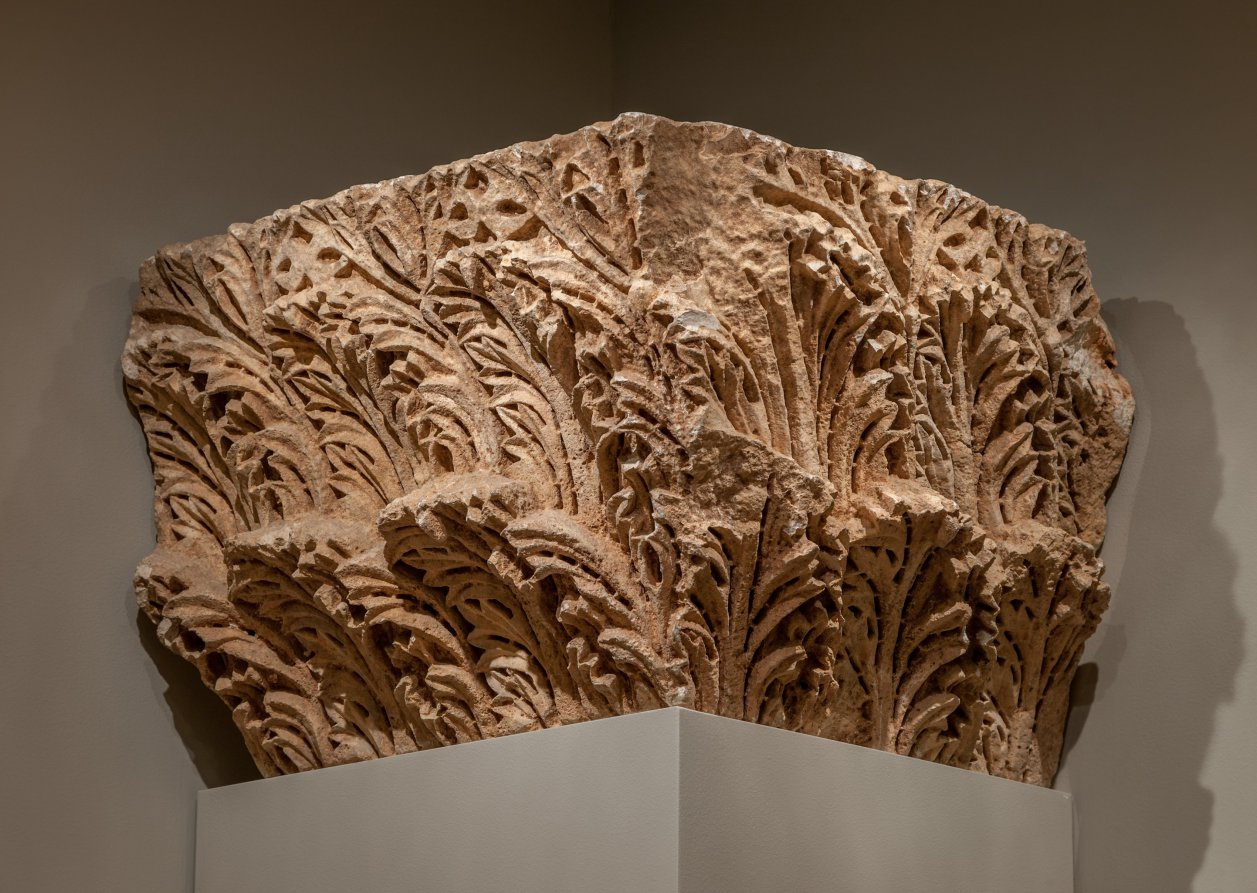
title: Engaged Capital with Windblown Acanthus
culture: Byzantium, Northern Syria, Byzantine period, 5th century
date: 400s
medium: limestone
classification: Sculpture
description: These capitals - the Capital with Acanthus and Crosses and the Engaged Capital with Windblown Acanthus - may have been found in Northern Syria and presumably come from a large and important church. Both capitals are decorated with leaves of acanthus, a fleshy plant with jagged leaves native to the Mediterranean area. One capital is symmetrical with crosses in its ornament, the other is asymmetrical and gives the impression of windblown leaves.